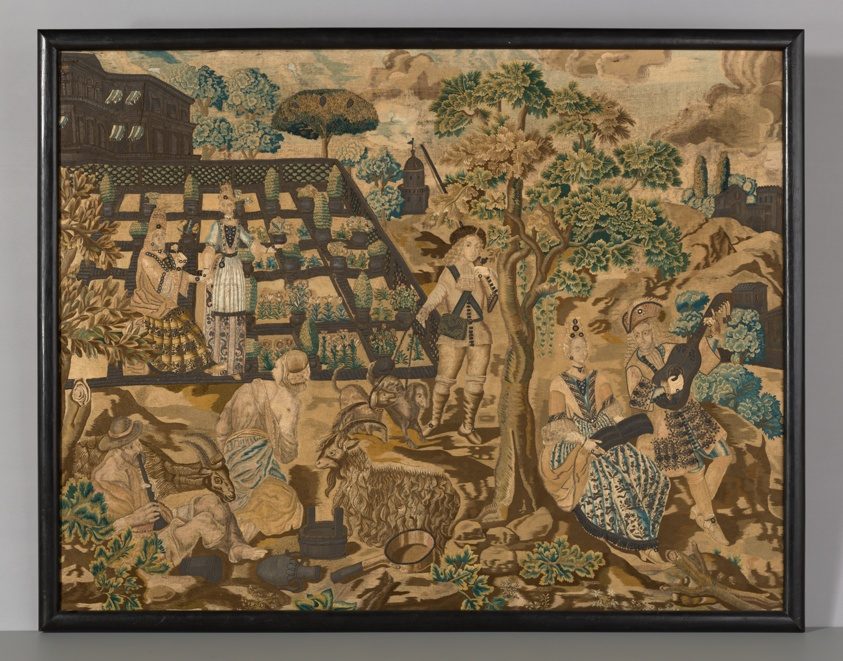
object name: Textile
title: Needlework Panel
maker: Portugal or England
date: Late 17th century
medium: Linen ground embroidered with silk and metal threads; attached pearls and mirrors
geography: Portugal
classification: textile; needlework (visual works)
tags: gardens, animals, English garden, foliage, hunting, landscapes, musical instruments, musicians, plants, trees